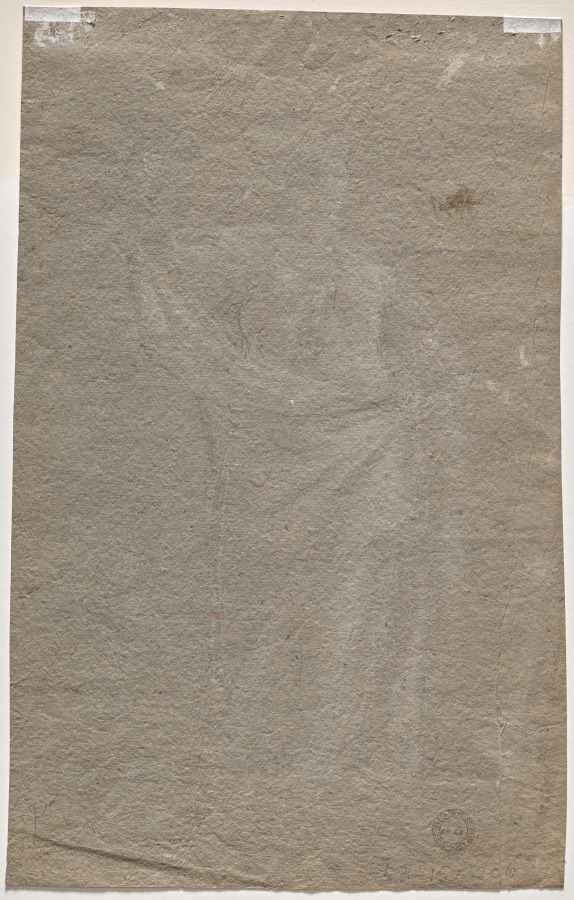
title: Allegorical Figure (verso)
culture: Italy, style of 17th Century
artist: Anonymous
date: 1800s?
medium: black and white chalk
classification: Drawing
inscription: lower left, in graphite: P [with check mark] ; lower right, in graphite: 53 - 15 = 206